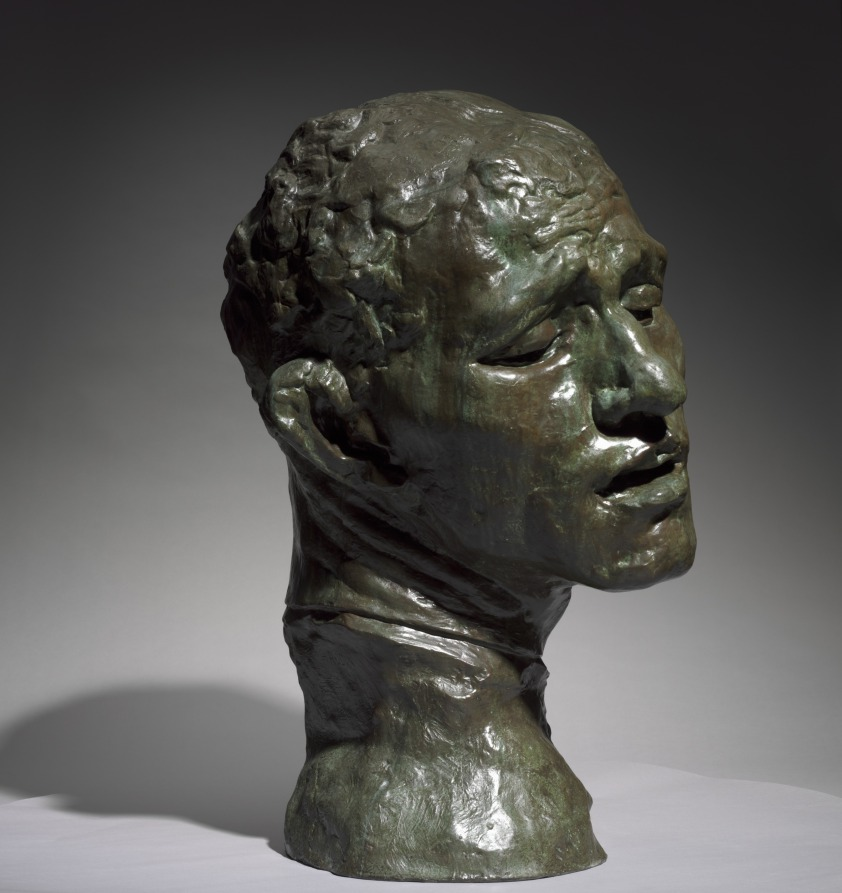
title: Heroic Head of Pierre de Wissant, One of the Burghers of Calais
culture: France, 19th century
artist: Auguste Rodin (French, 1840–1917)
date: 1886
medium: bronze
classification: Sculpture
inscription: inscribed at neck, left: A.Rodin; inscribed lower back: Alexis Rudier/Fondeur-Paris.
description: This sculpture depicts one of the figures in Rodin’s large public monument The Burghers of Calais (1884–89), featuring six French men who volunteered to be taken prisoner by the English in exchange for lifting the siege of Calais during the Hundred Years War (1337–1453). Pierre de Wissant’s anguished expression suggests extreme mental suffering as he contemplates his expected execution. Rodin exhibited a life-size version of the figure as an independent work before completing the monument. He later made multiple versions in various sizes and media.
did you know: This sculpture depicts the head of a figure from Rodin's large public monument The Burghers of Calais (1884-89). The CMA also owns a plaster version of the head.